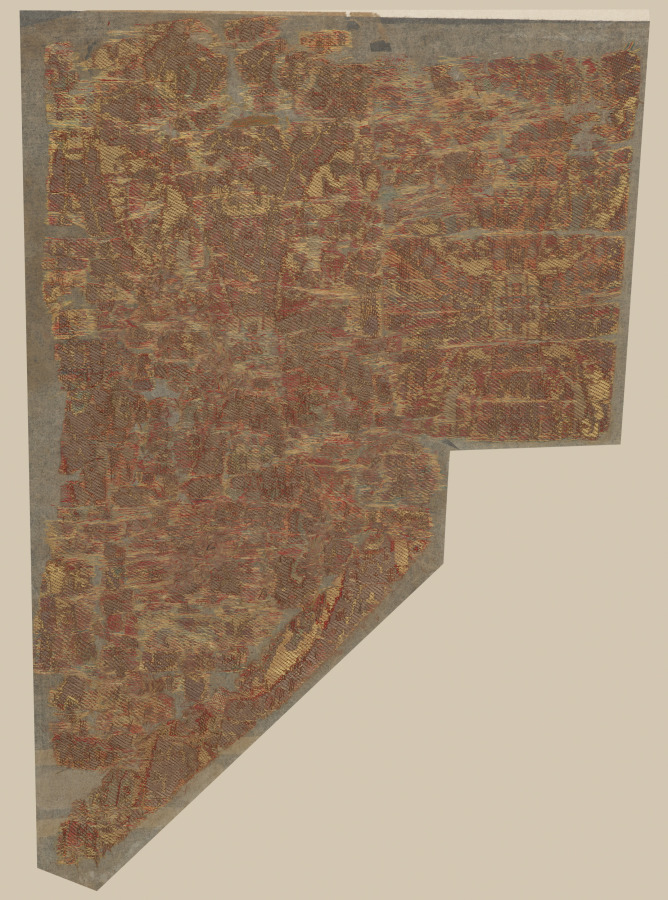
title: Fragment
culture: China or Japan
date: 700s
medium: compound twill, silk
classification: Textile